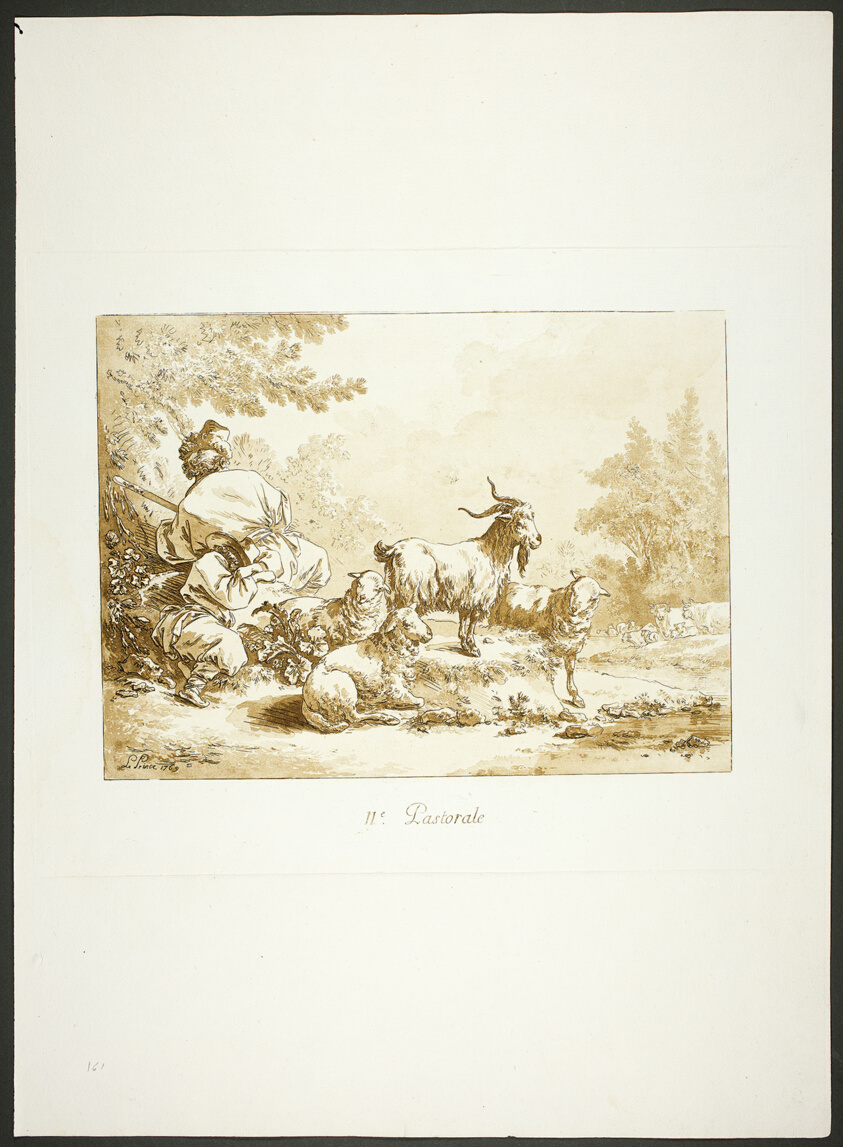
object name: Print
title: Second Pastoral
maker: Jean-Baptiste Le Prince; French, 1734-1781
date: 1769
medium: Aquatint and etching in sepia on ivory laid paper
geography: France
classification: aquatint; print; prints and drawing